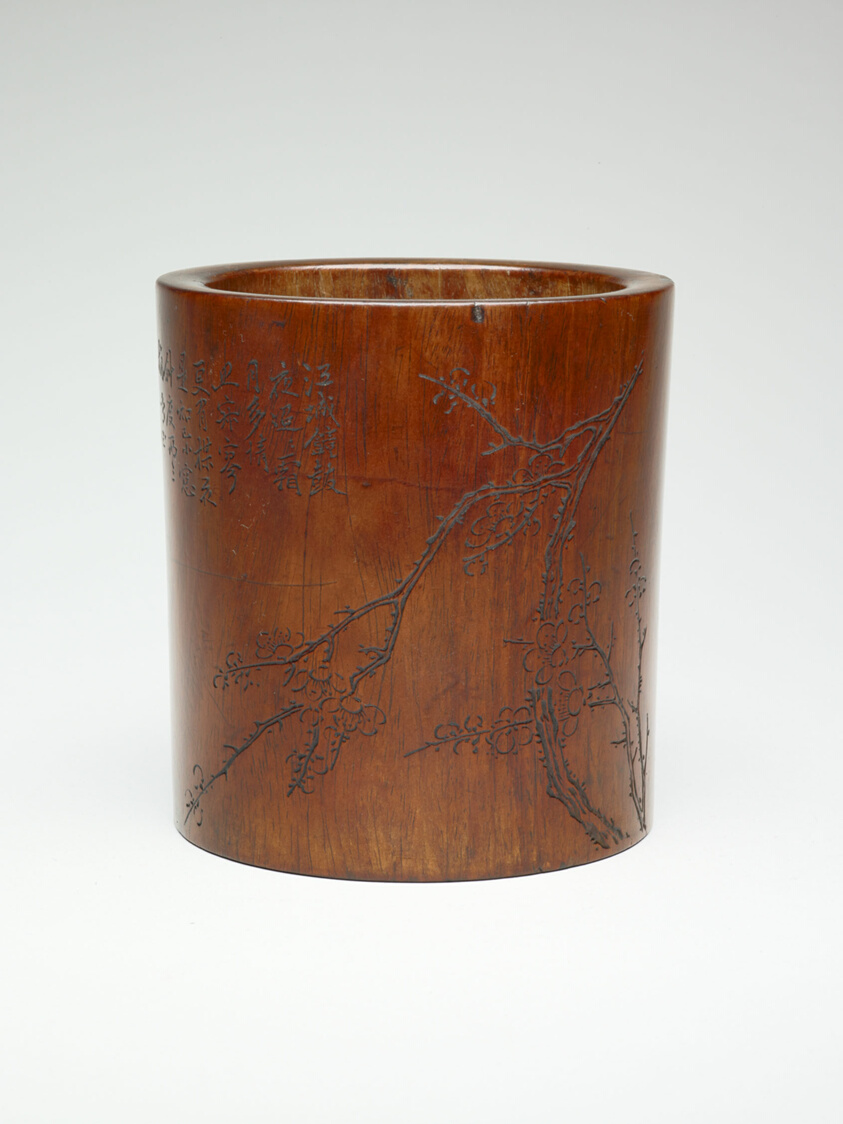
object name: Decorative Arts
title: Brush Holder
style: Chinese (culture or style)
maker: Ma Guozhen; Chinese (active 1796-1821)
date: Qing dynasty (1644–1911), early 19th century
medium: Wood (huanghuali)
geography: China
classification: writing equipment; household accessory; container; decorative arts